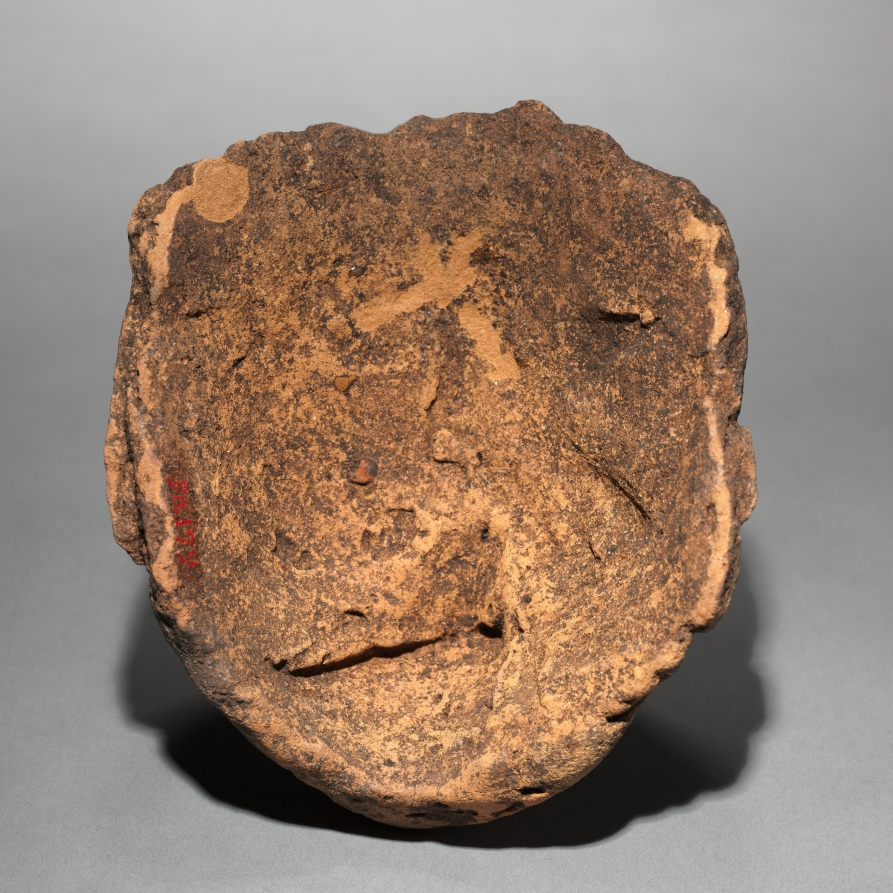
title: Face Fragment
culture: Mexico, Palenque region(?), Maya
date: 600–1000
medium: molded pottery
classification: Sculpture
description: This thick, heavy ceramic face fragment may come from an incensario (incense burner). Several features, including the tau- or T-shaped front teeth, suggest it represents a deity known today only as G1 due to difficulties in translating its Maya name, which is recorded in hieroglyphs. The deity’s meanings are equally elusive, though it seems to be associated with both the sun and water.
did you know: G1’s distinctive tooth was perhaps inspired by a 63 million-year-old fossilized shark tooth.